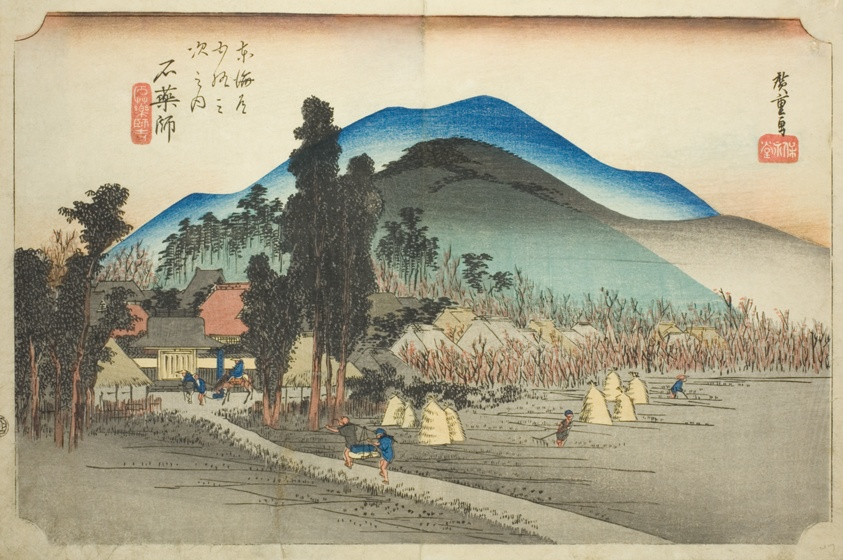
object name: Print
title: Ishiyakushi: Ishiyakushi Temple (Ishiyakushi, Ishiyakushiji), from the series "Fifty-three Stations of the Tokaido (Tokaido gojusan tsugi no uchi)," also known as the Hoeido Tokaido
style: Japanese (culture or style)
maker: Utagawa Hiroshige 歌川 広重; Japanese, 1797-1858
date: c. 1833/34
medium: Color woodblock print; oban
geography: Japan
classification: woodblock print; print; asian art